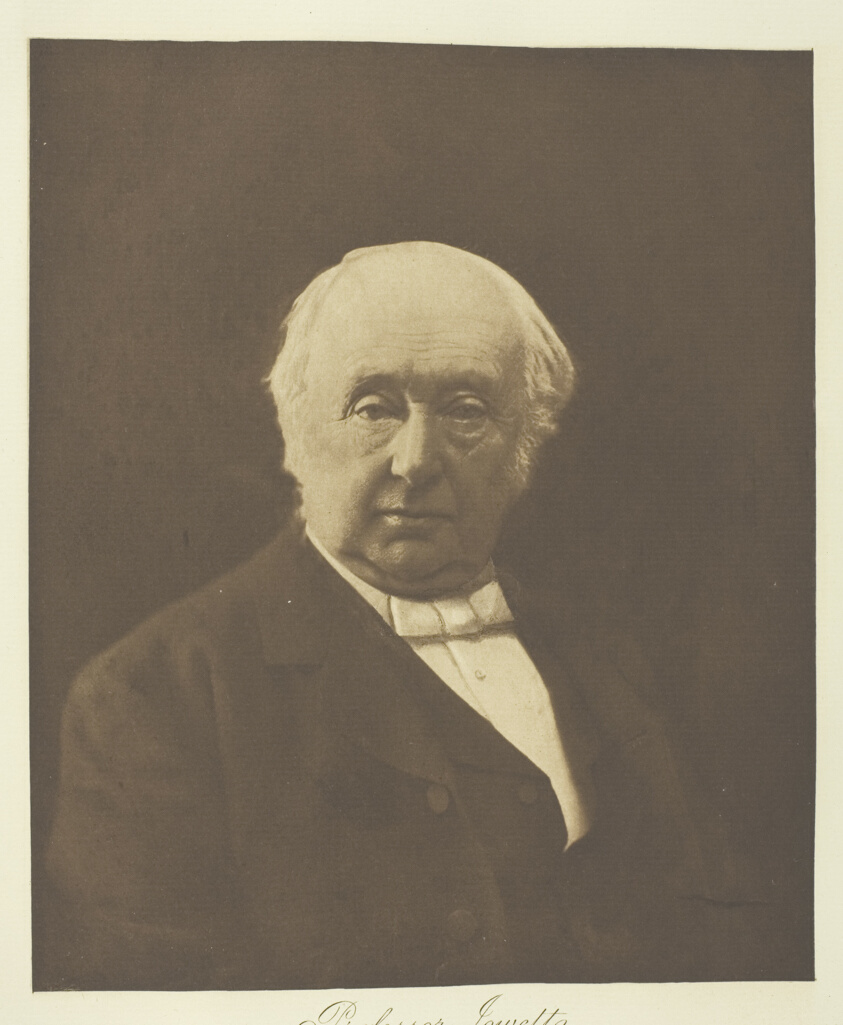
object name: Photograph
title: The Very Reverend Dr. Jowett (Master of Balliol, Oxford)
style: 19th century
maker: Julia Margaret Cameron (English, 1815–1879)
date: 1865, printed c. 1893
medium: Photogravure, plate 19 from the album "Lord Tennyson and his Friends" (1893)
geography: England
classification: photogravure; photomechanical process; photography; photograph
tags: Collected by Hugh Edwards, Lord Tennyson and His Friends